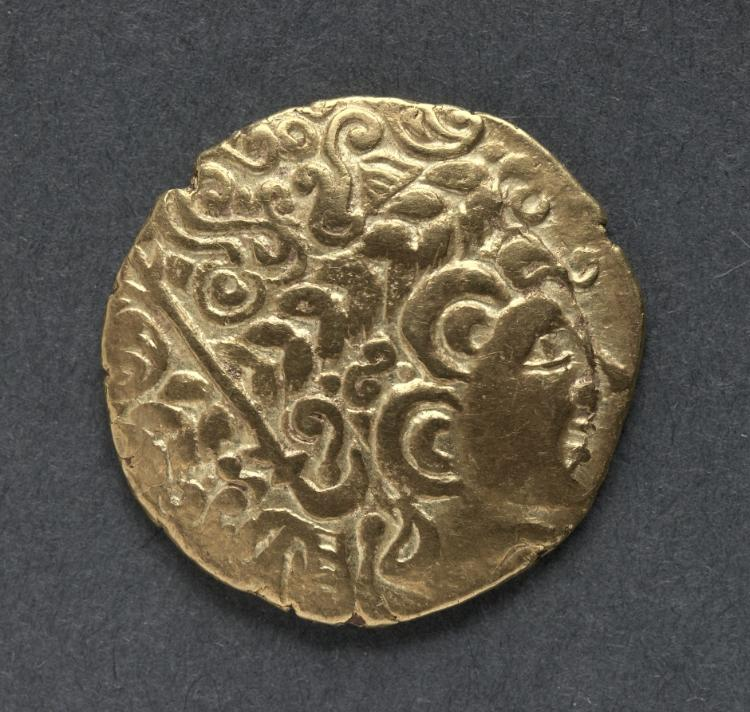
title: Bellovaci Stater: Degenerate Head in Imitation of Apollo (obverse)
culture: England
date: c. 125–100 BCE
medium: gold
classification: Coins